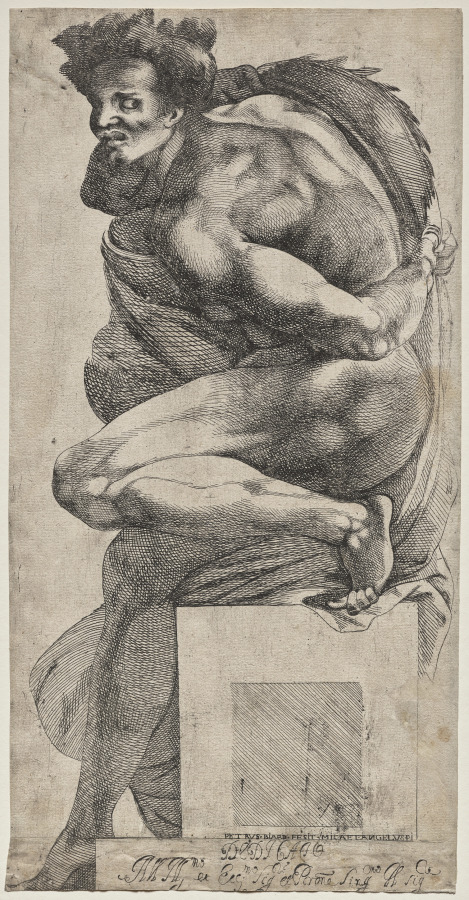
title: Ignudo (after Michelangelo)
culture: France, 17th century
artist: Pierre Biard the Younger (French, 1592–1661)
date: c. 1600–61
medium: etching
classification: Print